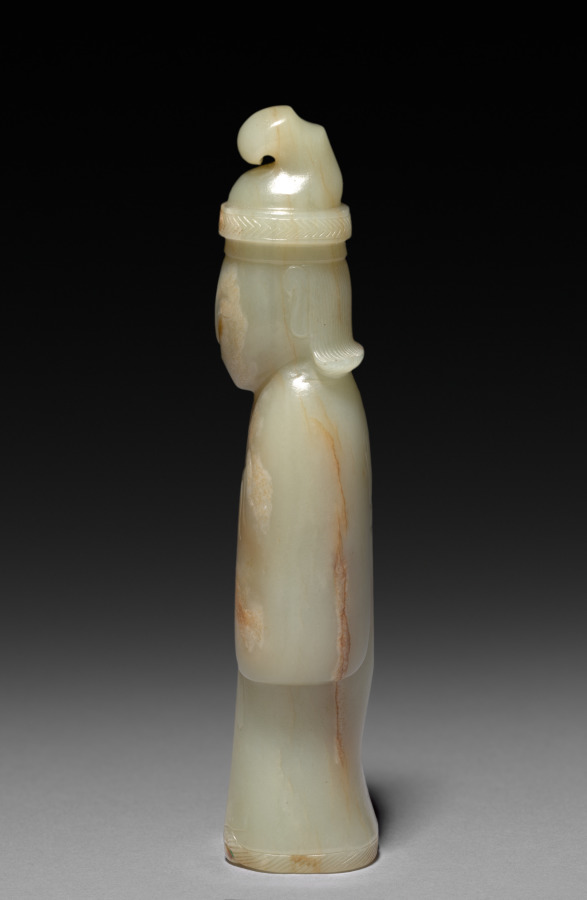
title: Standing Figure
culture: China, Qing dynasty (1644-1911)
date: 1644–1911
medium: jade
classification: Jade